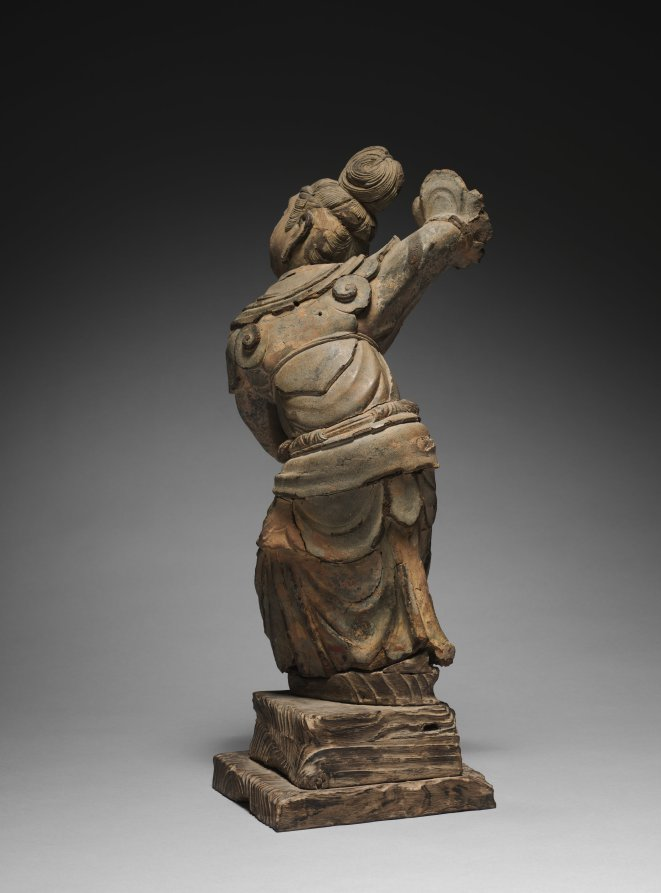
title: Dancing Apsaras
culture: China, late Tang dynasty (618–907) to Five dynasties (907–960)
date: 900s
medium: dry lacquer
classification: Sculpture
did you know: The sculpture was made from a rare technique involving alternate layers of cloth and lacquer, modeled on an armature or around a removable clay core.